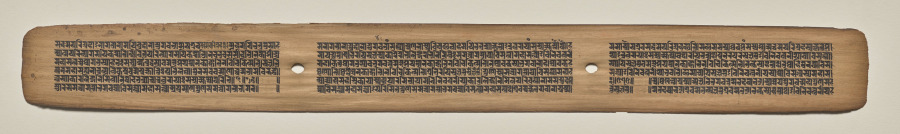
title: Text, Folio 120 (recto), from a Manuscript of the Perfection of Wisdom in Eight Thousand Lines (Ashtasahasrika Prajnaparamita-sutra)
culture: Eastern India, Bihar, Vikramashila Monastery. Painting: Nepal, Kathmandu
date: Sunday, September 14, 1119 (year 239 of the Newar Samvat in the month of Ashvina)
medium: gum tempera and ink on palm leaves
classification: Painting